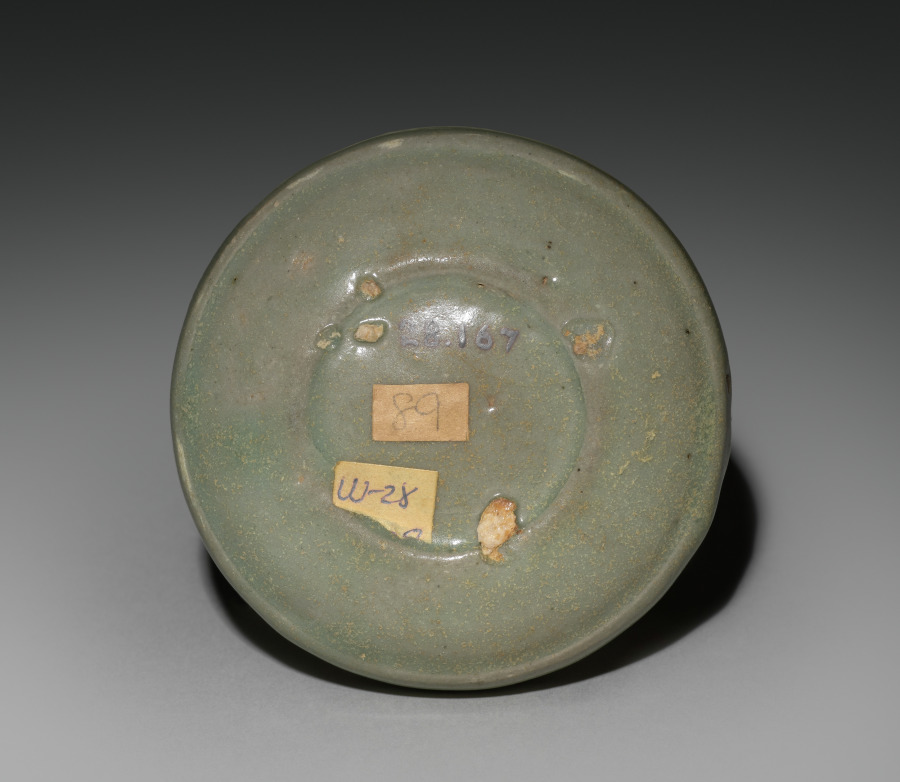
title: Pigment Box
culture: Korea, Goryeo dynasty (918–1392)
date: 1200s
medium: inlaid celadon ware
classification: Ceramic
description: Celadons, spoons, seals, and bronze mirrors were the most common burial objects in tombs during the Goryeo period (918–1392). Once used to contain colored powder, rouge, and eyebrow gel for makeup, this small container was one of the standard goods that furnished elites' tombs. Both women and men used the grain powder of rice or millet for whitening their skin, safflower extract for rouge, and plant ash or soot for eyebrow gel. Yet, natural-looking makeup seems to have been the most favorable one in Korea according to the travelogue by Xu Jing (1091–1153), the Chinese diplomat who visited Korea in 1123.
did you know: This ceramic container was used to store either incense or cosmetics.